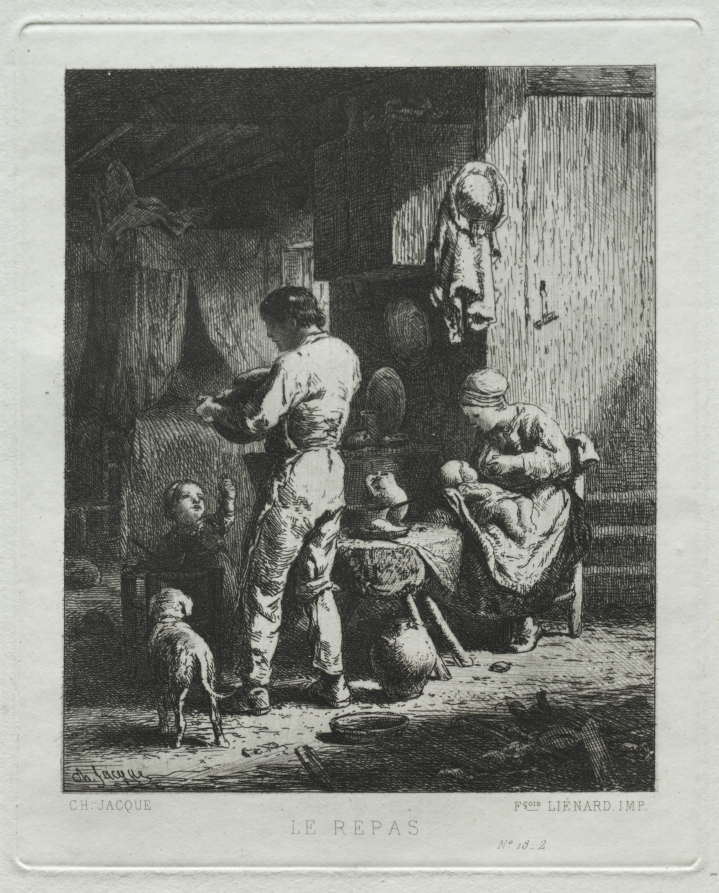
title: The Repast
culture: France, 19th century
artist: Charles-Émile Jacque (French, 1813–1894)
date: 1864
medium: etching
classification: Print